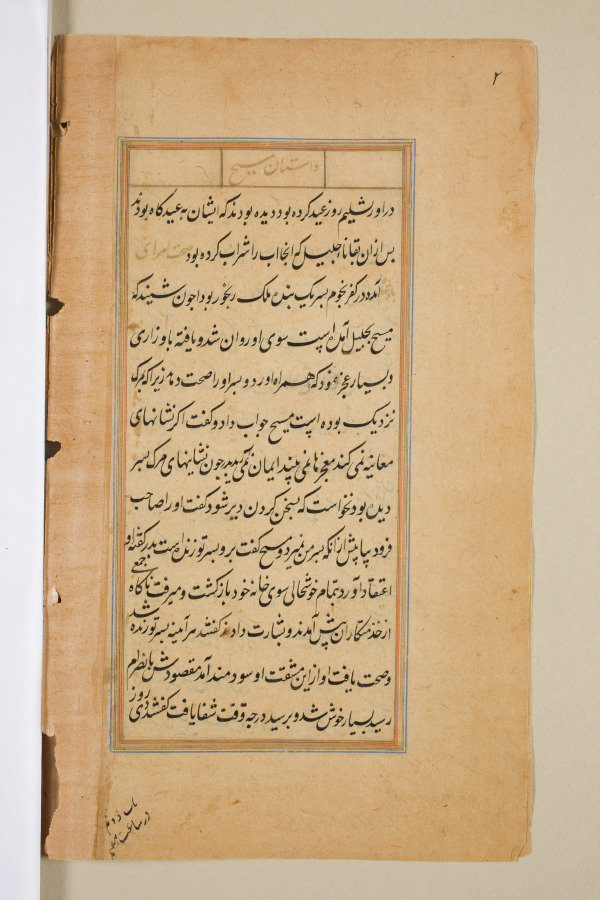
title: Text page from a Mirror of Holiness (Mir’at al-quds) of Father Jerome Xavier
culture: Mughal India, Allahabad, made for Prince Salim (1569–1627)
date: 1602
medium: Ink and gold on paper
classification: Manuscript